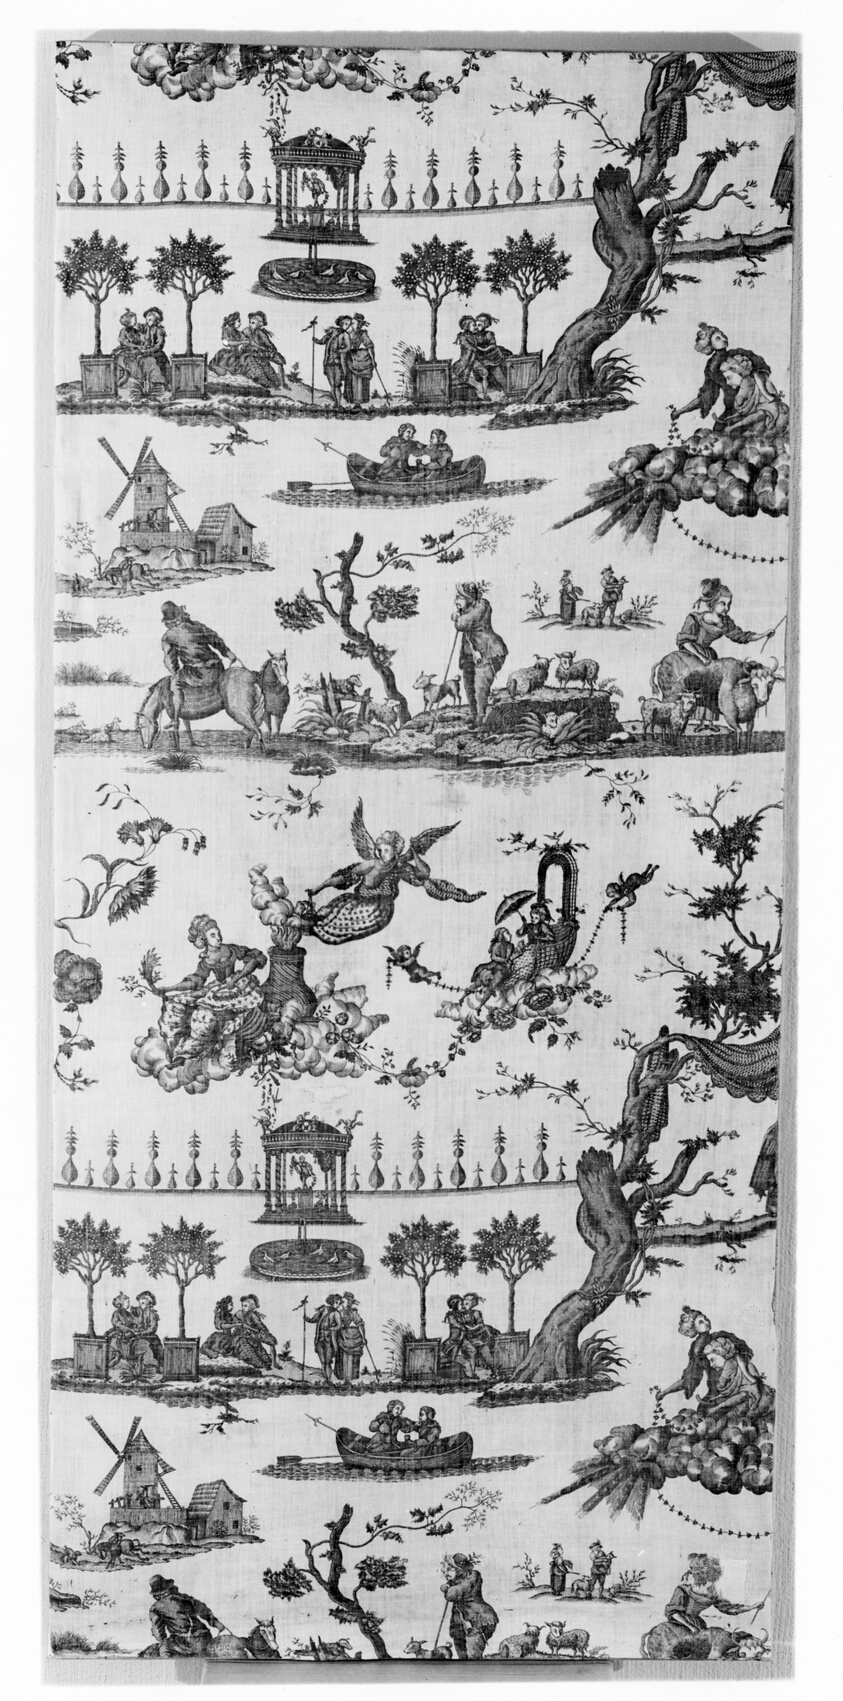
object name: Textile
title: Le Temple de L'Amour (The Temple of Love) (Furnishing Fabric)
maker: Manufactured by Gorgerat Frères et Cie.; France, Nantes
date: c. 1785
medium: Cotton, plain weave; copperplate printed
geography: Nantes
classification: textile; weaving - printed; furnishing textile